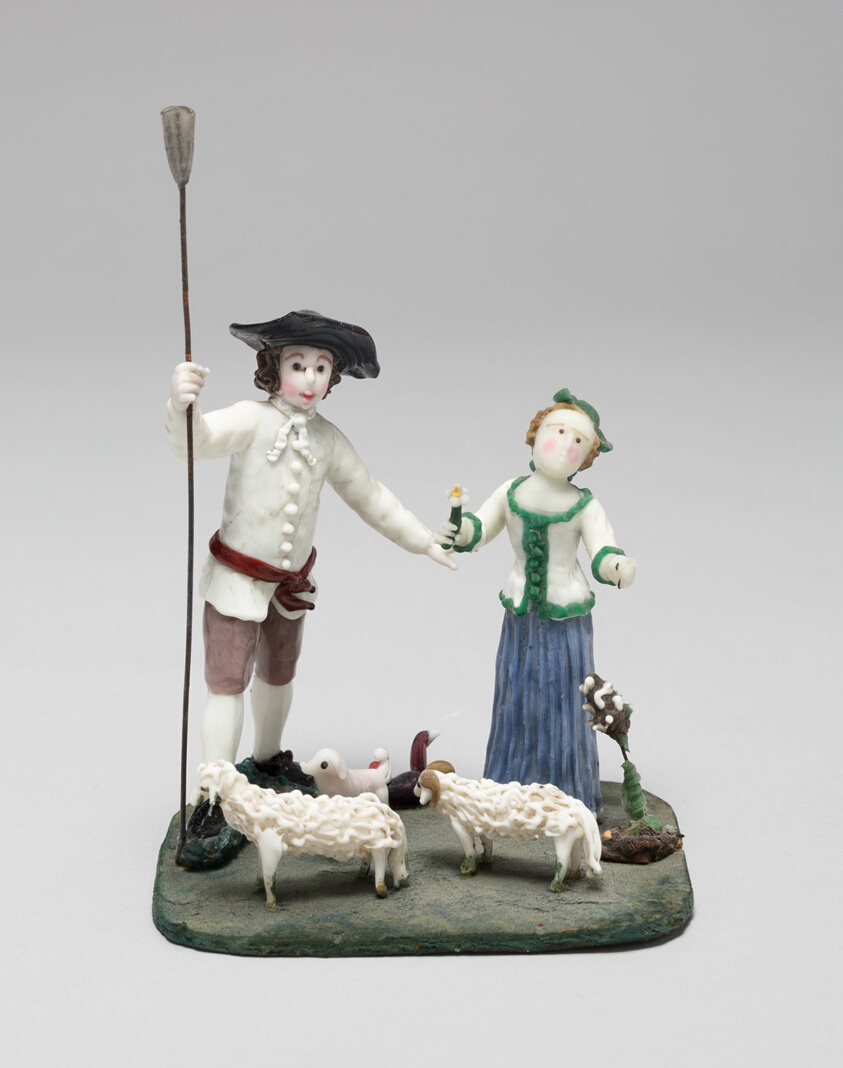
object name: Glass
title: Shepherd and Shepherdess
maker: Nevers, France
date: Late 18th century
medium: Glass; lampwork (verre de Nevers), metal armature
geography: France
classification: decorative object/ornament; lampwork; glass; european decorative arts